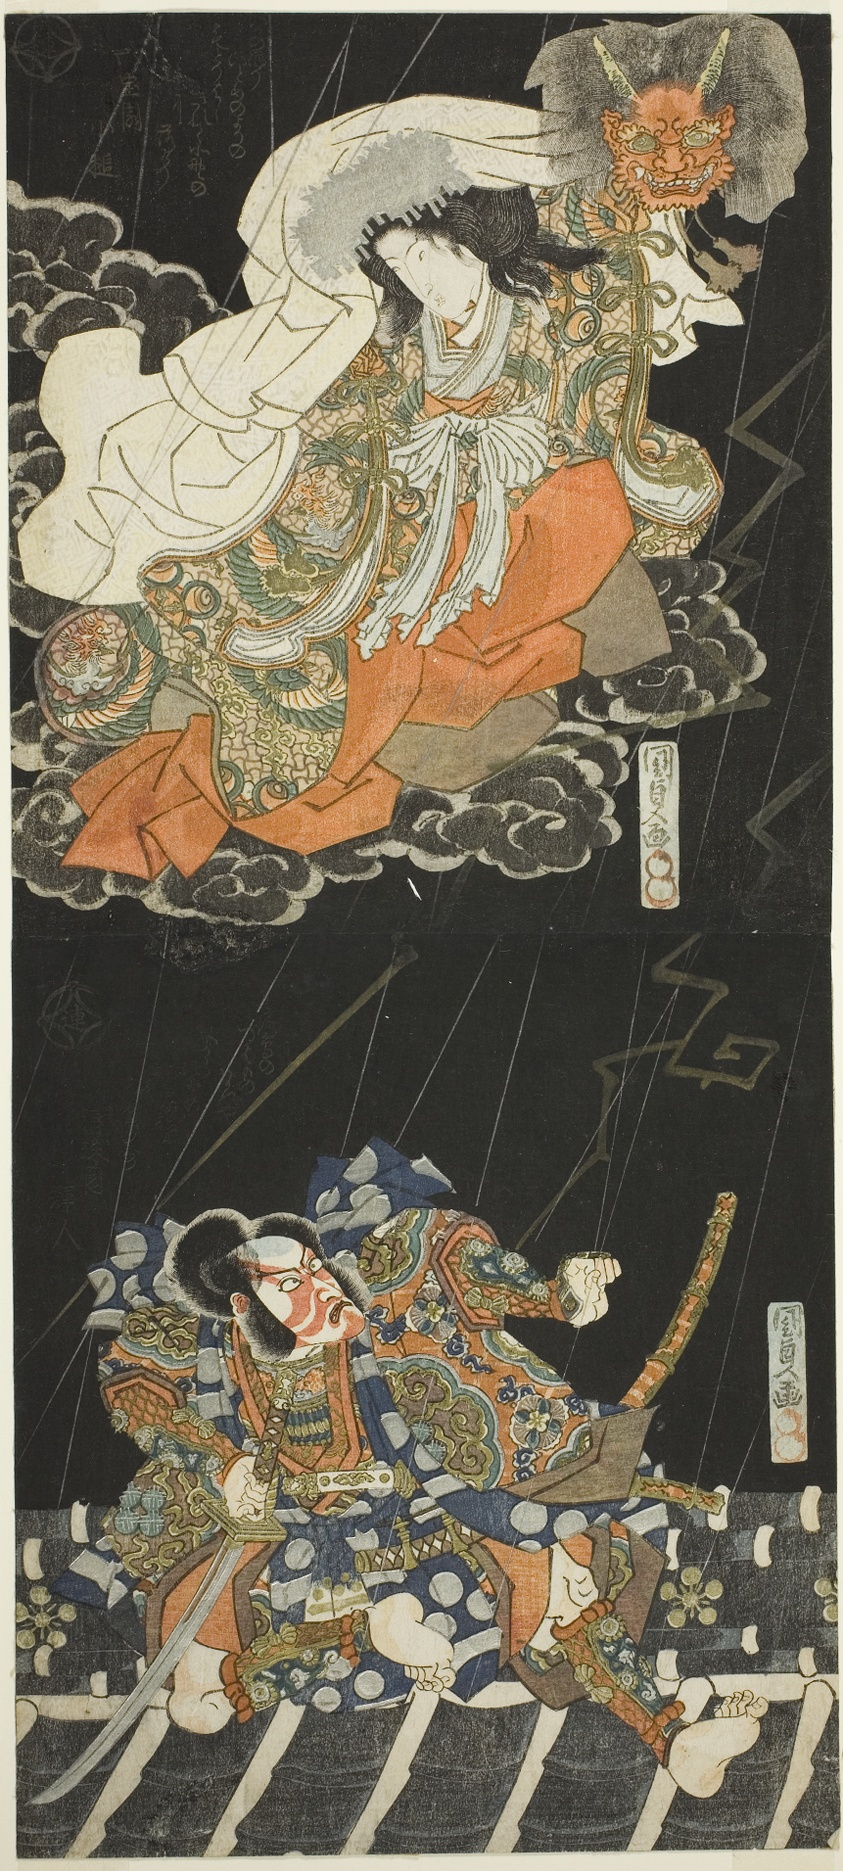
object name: Print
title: Ichikawa Danjūrō VII as Watanabe no Tsuna and Segawa Kikunojō V as the Female Demon, in “Modori Bridge” (Modoribashi)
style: Japanese (culture or style)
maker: Utagawa Kunisada (Japanese, 1786-1864)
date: 1833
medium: Color woodblock print; surimono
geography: Japan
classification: print; asian art